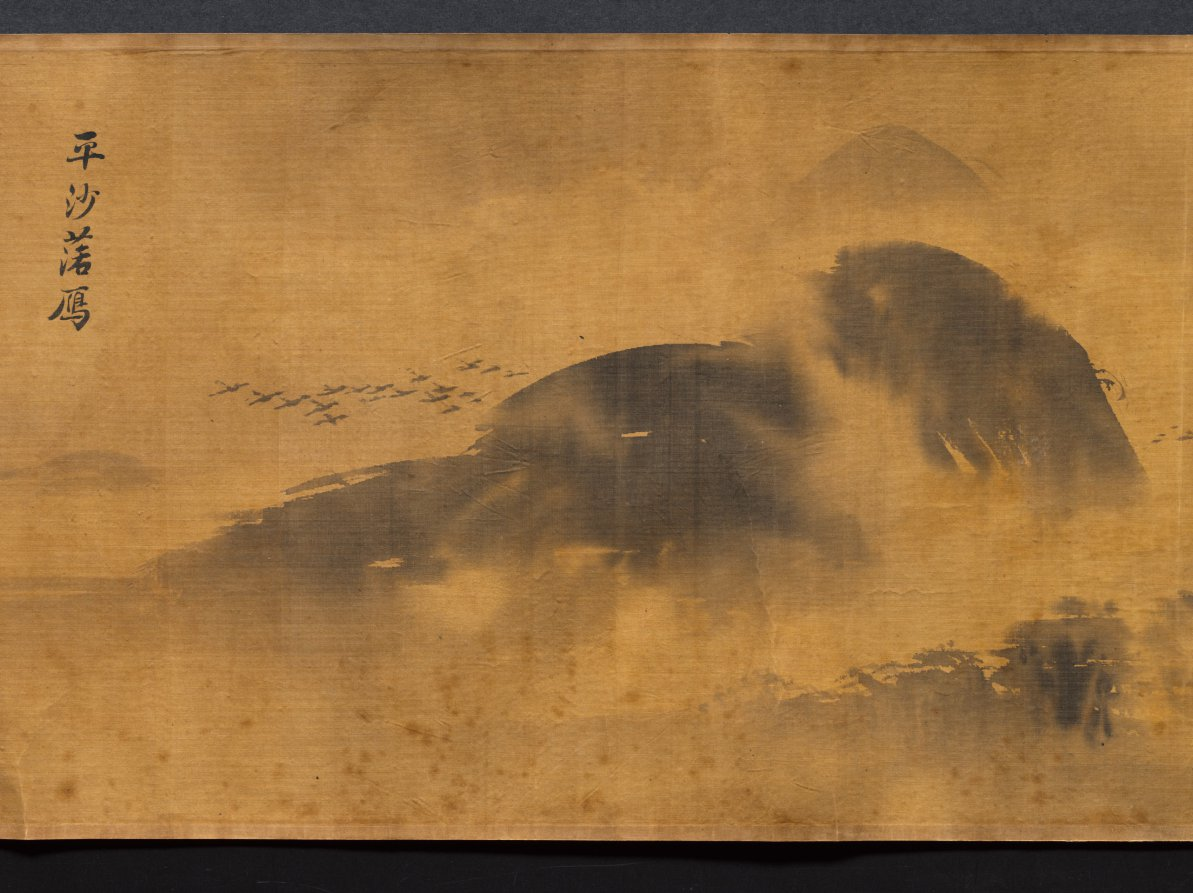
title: Eight Views of Xiao-Xiang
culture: Japan, Edo period (1615–1868)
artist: Kano Tan’yū (Japanese, 1602–1674)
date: 1615–1868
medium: handscroll; ink on silk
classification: Painting